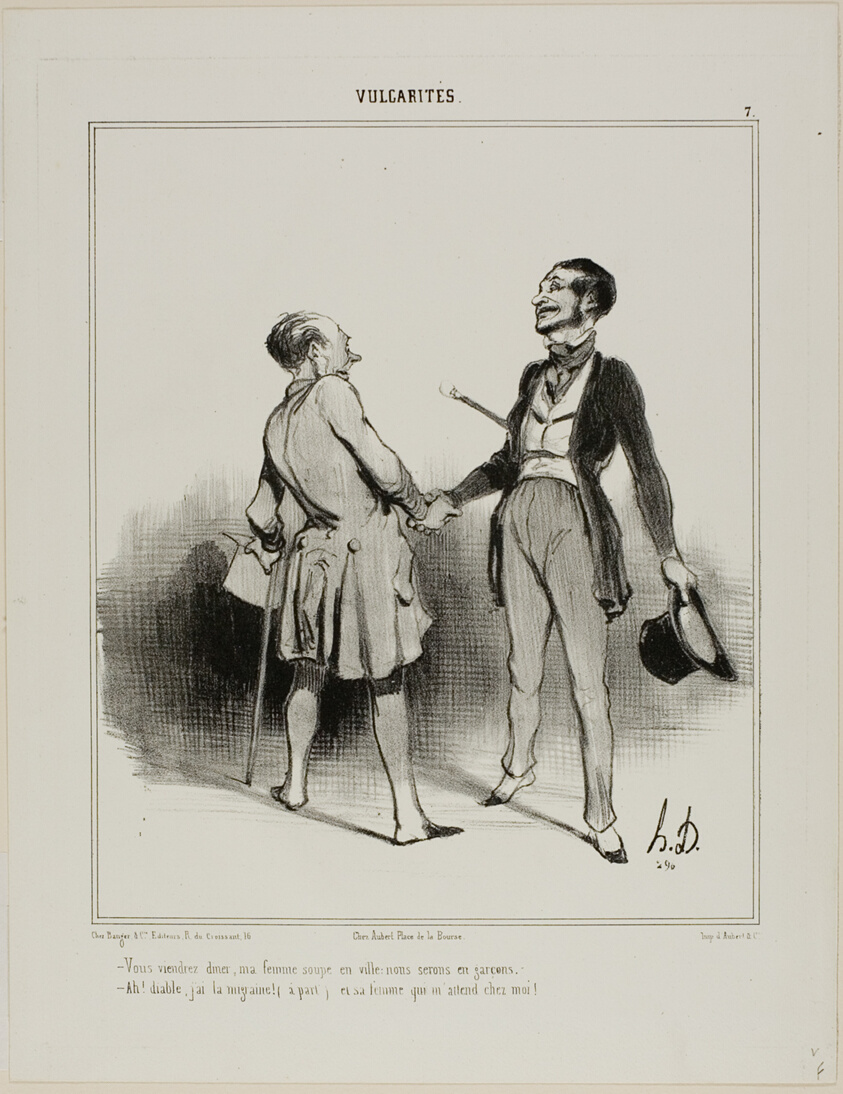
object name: Print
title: “- You must come to have dinner, my wife will eat in town.. it is just us two men! - Ah, the Devil! I have a terrible headache (aside) and his wife is waiting for me!,” plate 7 from Vulgarités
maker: Honoré Victorin Daumier; French, 1808-1879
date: 1841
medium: Lithograph in black on white wove paper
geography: France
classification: lithograph; print; prints and drawing